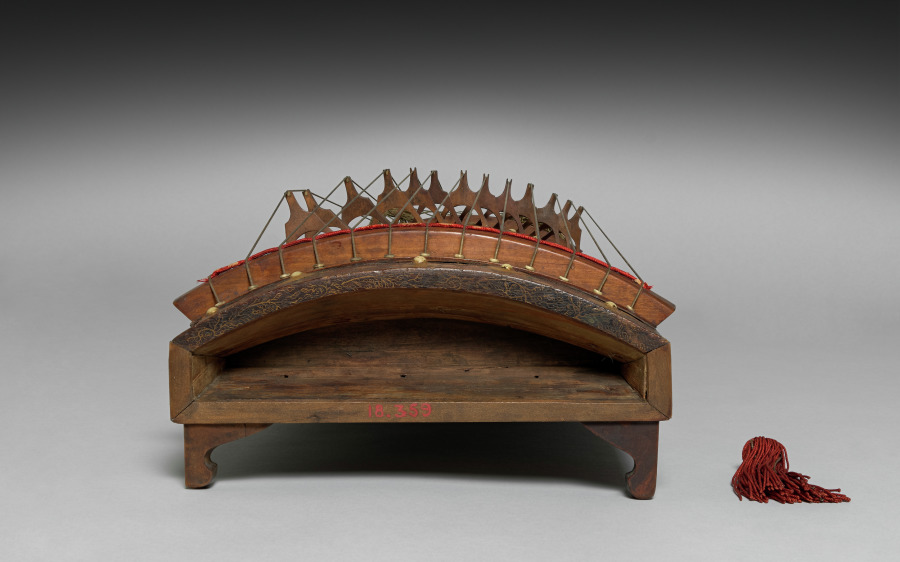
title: Koto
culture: Japan, Edo period (1615–1868)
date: early to mid-1800s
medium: Wood with colored lacquer, sprinkled gold powder (maki-e), glass, textile and cord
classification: Musical Instrument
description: This koto has an elaborately decorated surface, suggesting that it was meant to be admired as a decorative object rather than played as a musical instrument. The vertical design shows a profusion of chrysanthemum and miscanthus grass above a brushwood fence as well as a pair of butterflies.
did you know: The koto descended from the guzheng, a Chinese zither first imported to Japan in the seventh century.